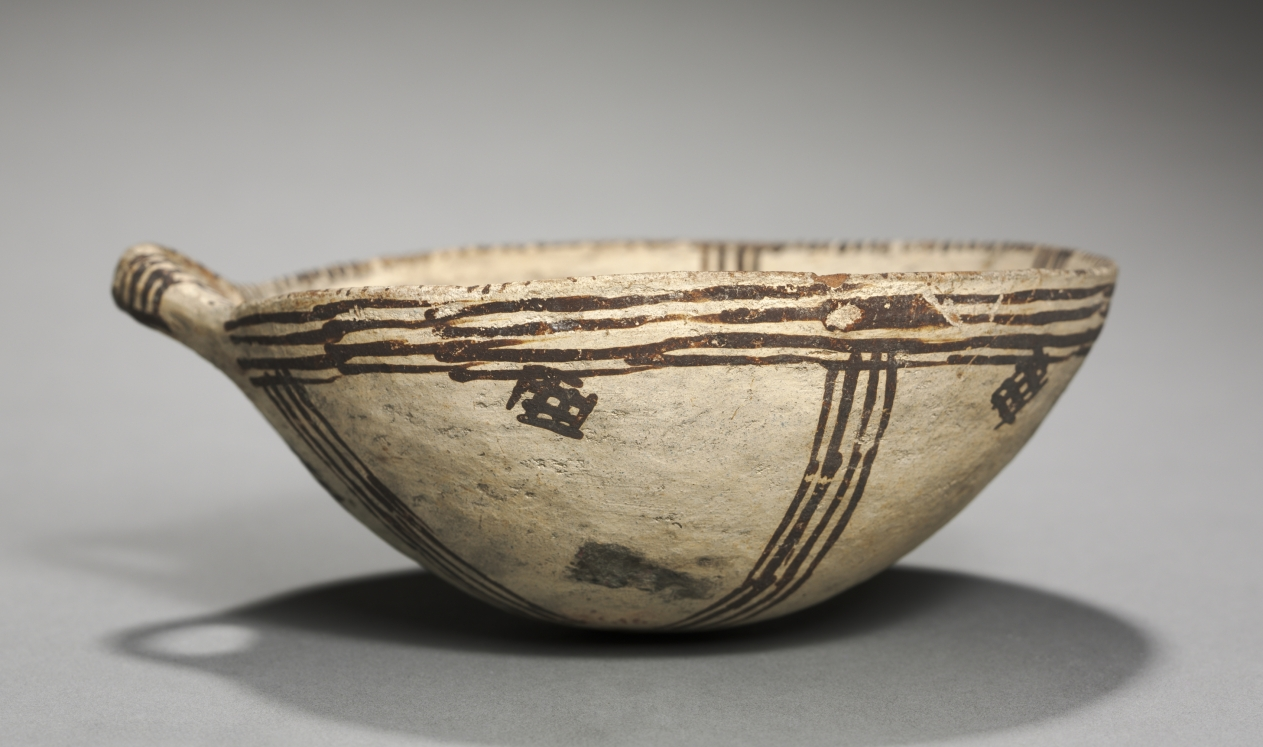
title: One-Handled Bowl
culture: Cyprus, late Cypriot II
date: c. 1450–1200 BCE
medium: white slip ware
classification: Ceramic